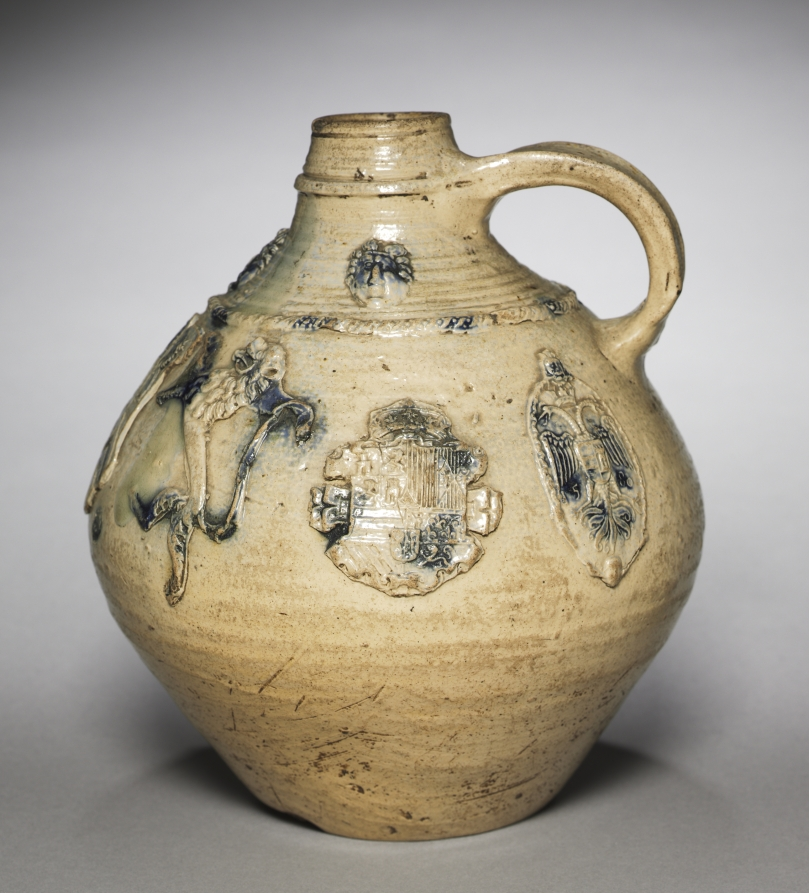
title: Jug with the Arms of Cleves-Berg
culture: Germany, Siegburg, 16th century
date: 1580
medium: salt-glazed stoneware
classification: Ceramic